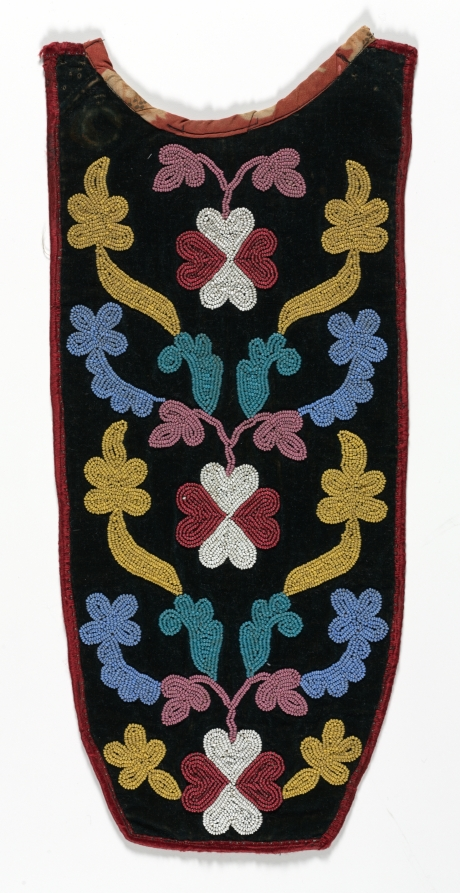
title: Placket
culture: Northeast Woodlands, Great Lakes Region, Anishinaabe (Ojibwe) or Nehiyawak (Cree) People?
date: late 1800s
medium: Velvet, cotton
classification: Garment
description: In the 1800s, native peoples began to use European fabrics to fashion fine formal garments; they favored sturdy cloth, such as velvet and wool broadcloth, which provided support for heavy decorative beadwork that was added by hand. Often the fabric was a dark color, providing dramatic contrast for the multicolored beads. Rather than encrusting the entire garment, beadwork was confined to cuffs, “epaulettes,” bib-like plackets and yokes, rectangular panels sewn to leggings, shirts, and dresses, and the like.